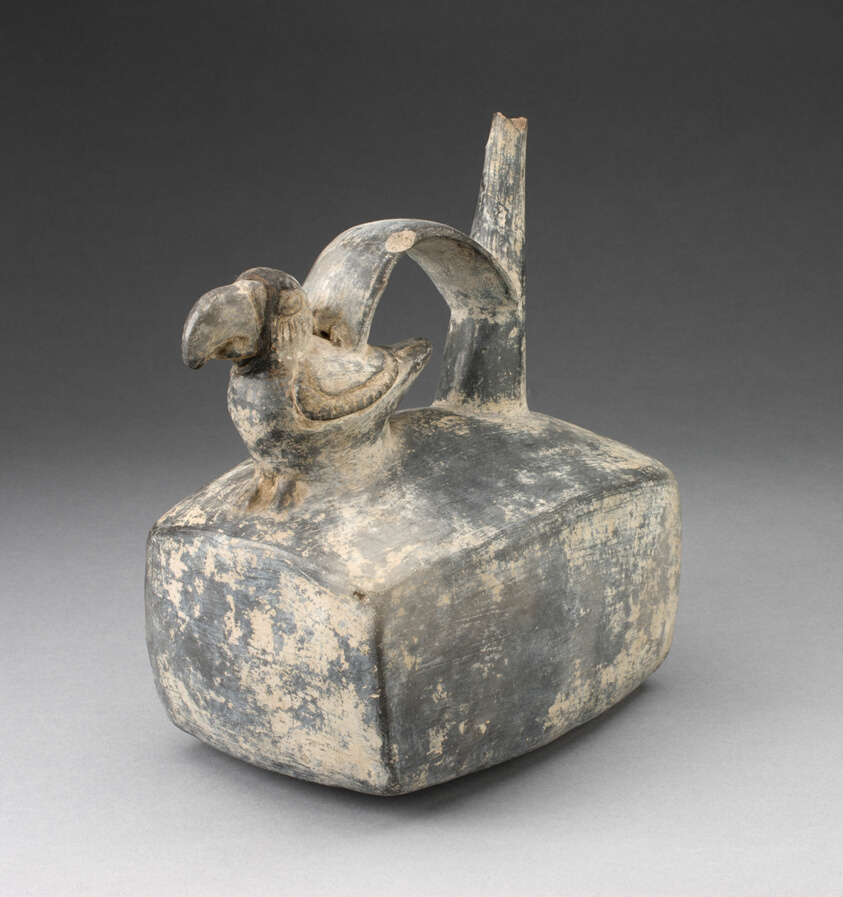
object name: Vessel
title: Square Spouted Vessel with Parrot Molded on Handle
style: moche, mochica, early intermediate period, Pre-Columbian, americas, Arts of the Americas, andean, andes, south american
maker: Moche or Lambayeque; North coast, Peru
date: 250–550 CE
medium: Ceramic and pigment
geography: Peruvian North Coast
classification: earthenware; ceramics; vessel; art of the americas